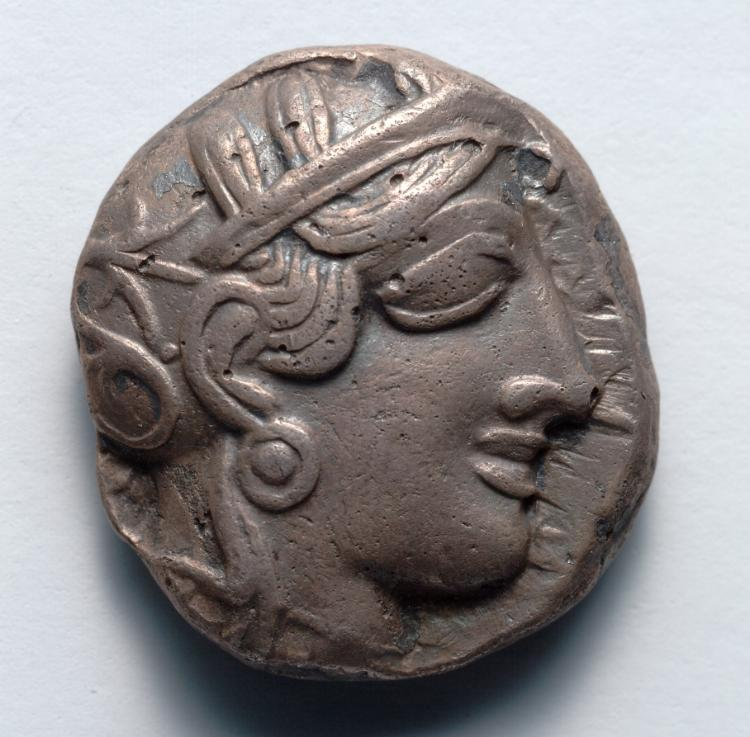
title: Tetradrachm: Head of Athena (obverse)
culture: Greek, minted at Athens (Attica)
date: 480–449 BCE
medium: silver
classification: Coins